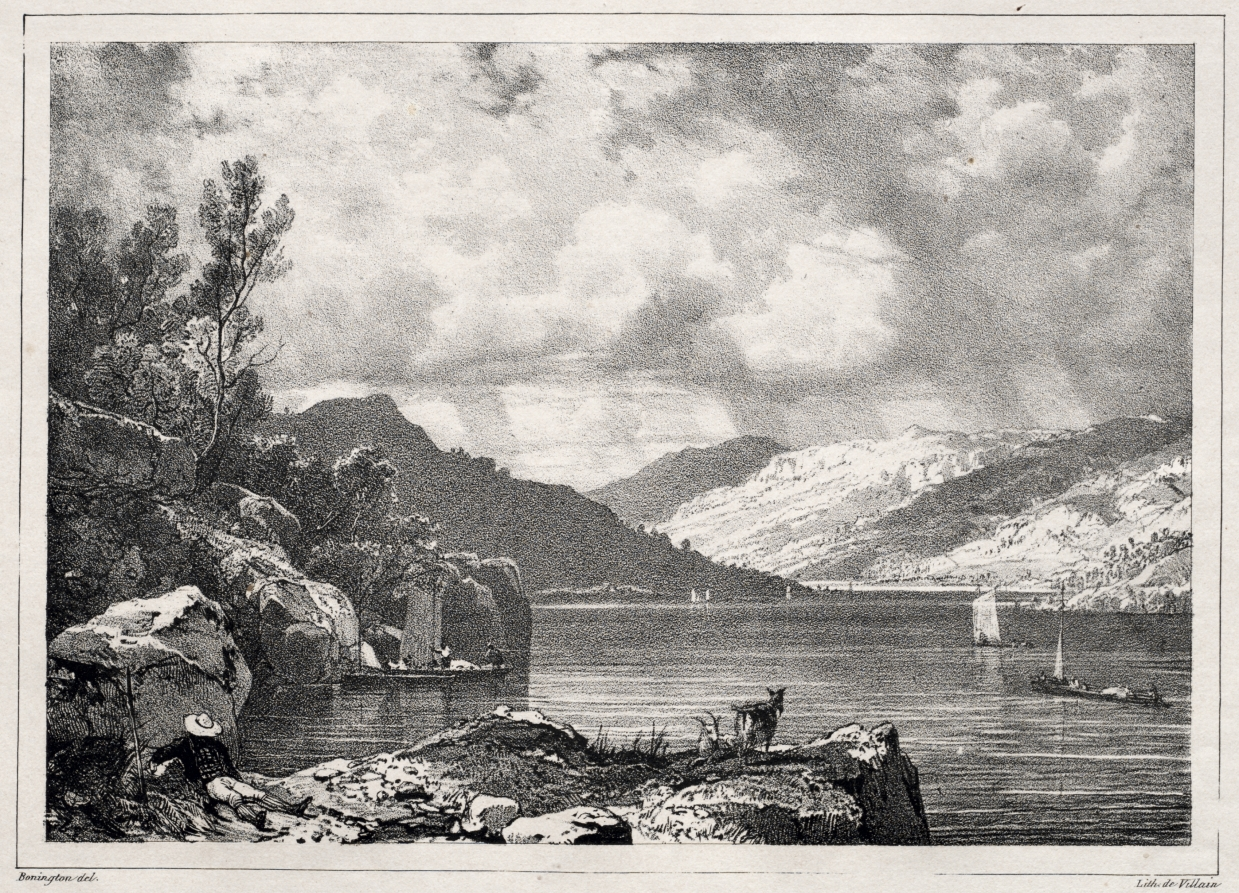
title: Loch Lomond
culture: England, 19th century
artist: Richard Parkes Bonington (British, 1802–1828)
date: 1826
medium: lithograph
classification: Print